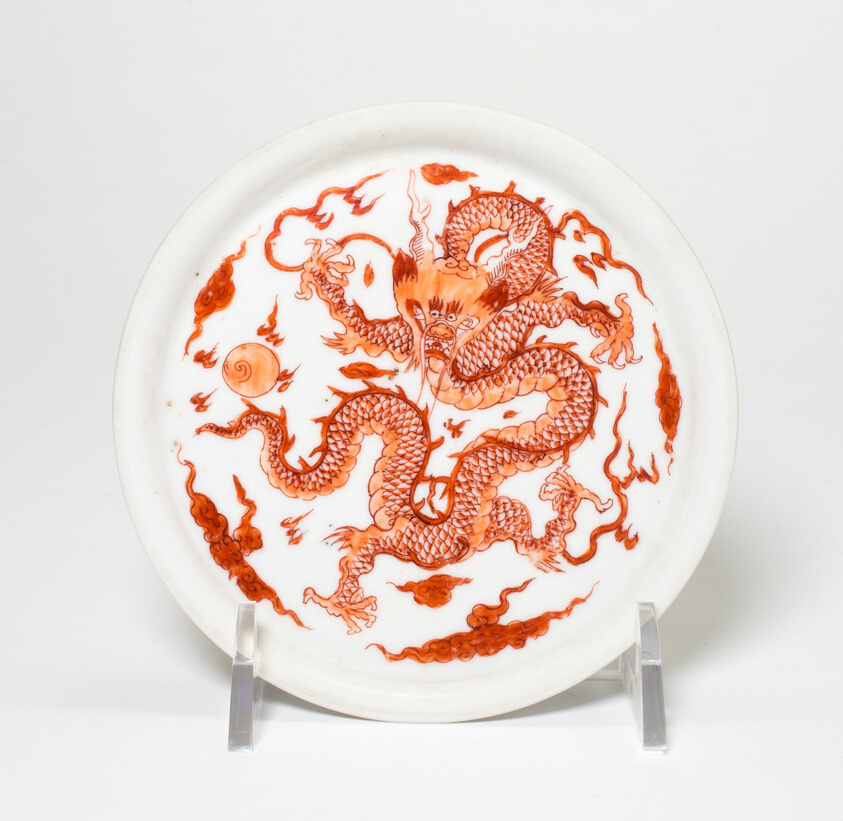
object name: Vessel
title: Dish with Five-Clawed Dragon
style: Chinese (culture or style)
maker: China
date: Qing dynasty (1368–1911), 17th/18th century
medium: Porcelain painted in underglaze iron red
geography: China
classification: dish (vessel); porcelain; ceramics; asian art; vessel